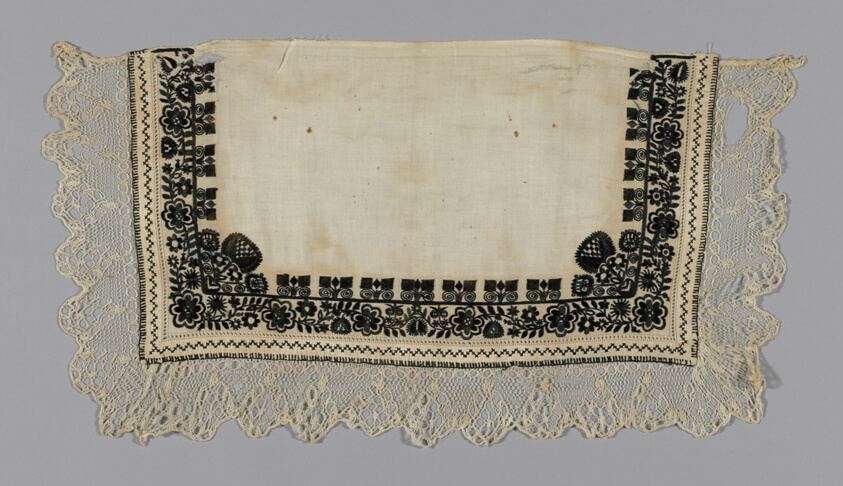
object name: Costume and Accessories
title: Scarf End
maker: Spain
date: 19th century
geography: Spain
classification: textile; needlework (visual works); costume accessory; costume; dress (garment); clothing